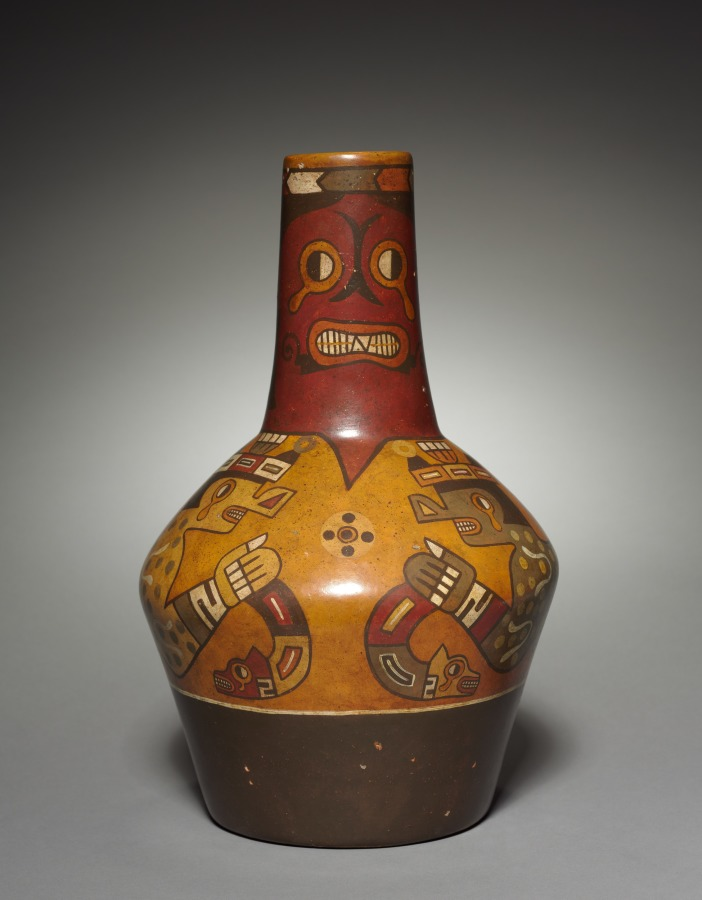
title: Wari-style Vessels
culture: Peru, modern, 20th century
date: before 1955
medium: pottery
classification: Forgery